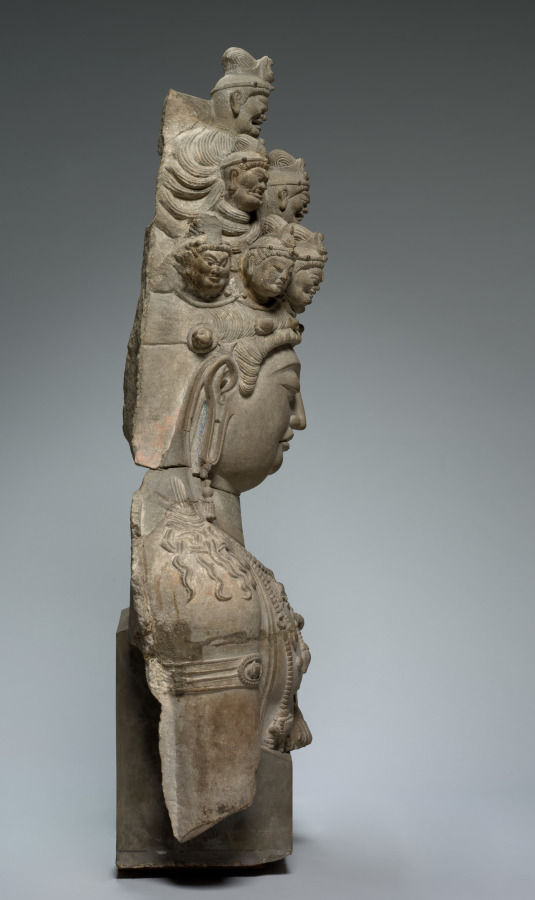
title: Eleven-Headed Guanyin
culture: China, Tang dynasty (618-907)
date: early 700s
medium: gray sandstone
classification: Sculpture